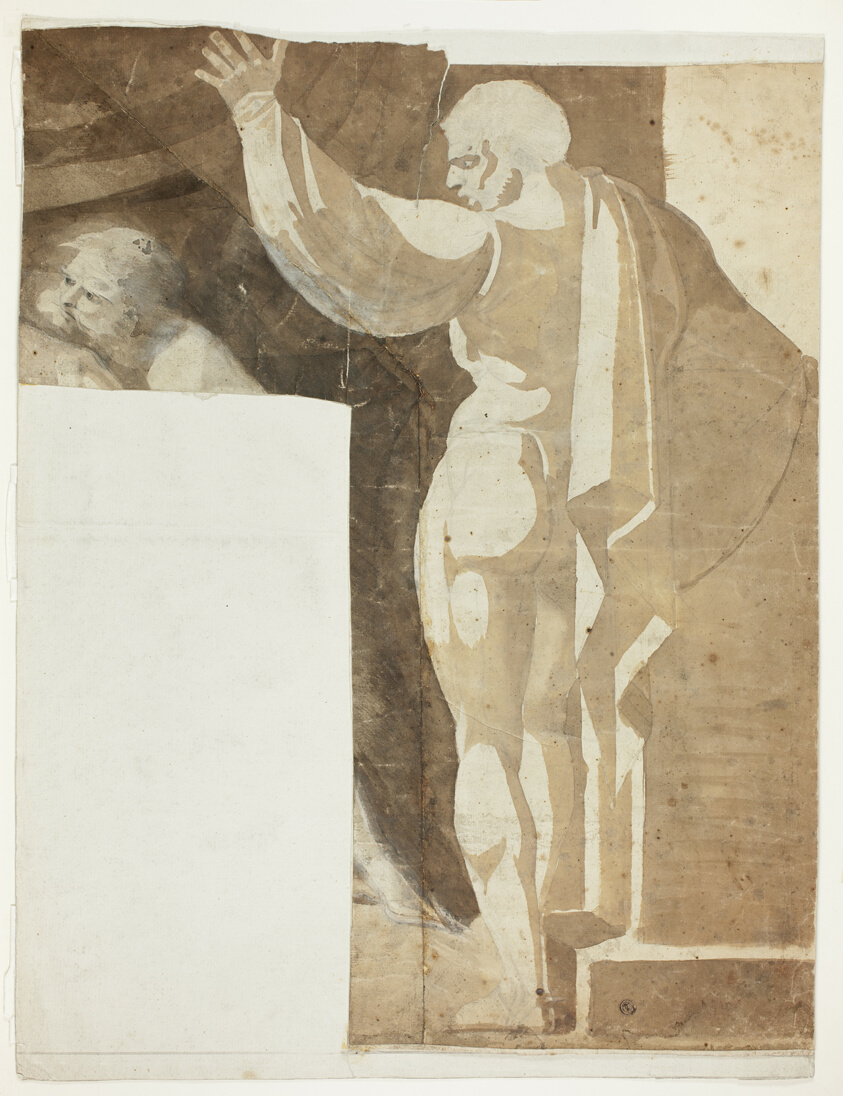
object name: Drawing and Watercolor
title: Male Figure with Left Arm Raised Seen from the Back, and Fragment of Old Man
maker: Henry Fuseli (Swiss, active in England, 1741-1825)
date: 1770/75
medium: Brush and brown wash, heightened with white gouache, over graphite, on cream laid paper, laid down on ivory laid paper, laid down on ivory laid paper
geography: England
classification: ink or chalk wash; drawings (visual works); prints and drawing; paper